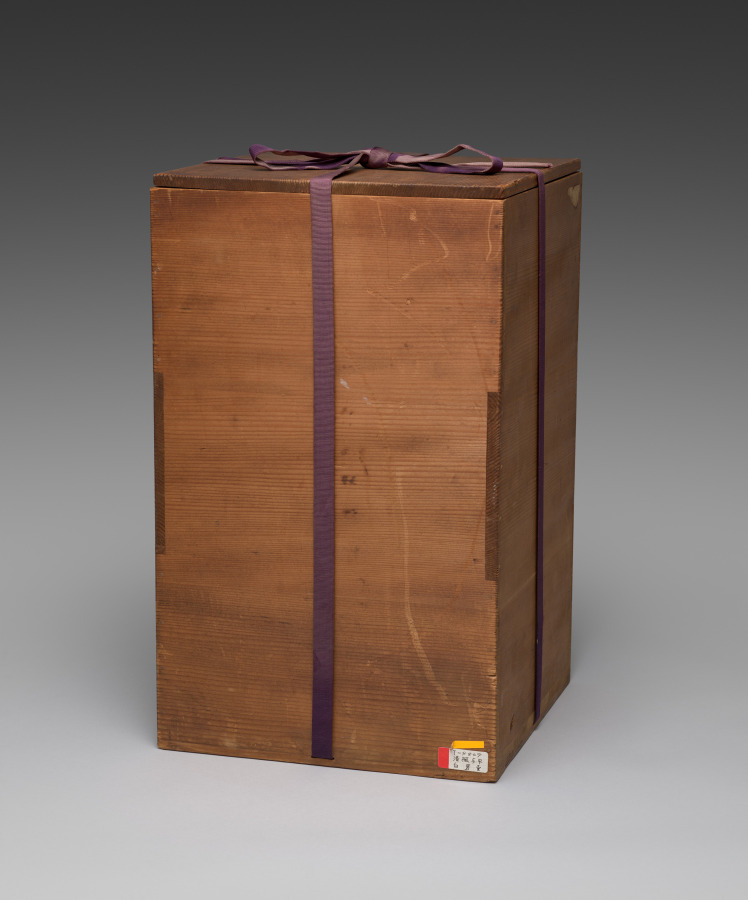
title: Pheasants in Cherry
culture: Japan, Meiji period (1868–1912)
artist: Seifū Yohei III (Japanese, 1851–1914)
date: 1900–1914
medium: Porcelain with molded and carved design, underglaze color, and cream glaze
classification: Ceramic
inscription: 大日本清風造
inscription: 清風製之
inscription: 清風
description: Like the design of Flower Vase with Phoenix in Paulownia (CMA 2022.199), the pair of pheasants in a dramatic landscape setting on this vase was created by adding clay to the surface of the clay body and then molding and carving it. Here, instead of a typical white clay, Yohei III has used an ivory clay. He then added gradated pink around the complex design, which with its multitude of cherry blossoms must have been painstaking to mask with precision. For the birds’ eyes, he added a touch of yellow. He then fired the vase with an allover translucent cream glaze. The resulting kanpakuji piece is one in which an academic subject long favored by painters of the Kano school for screen and sliding door paintings in important buildings, that of impressively sized birds within a scene of precipitous, angled rock faces and twisting trees, is made soft and ethereal while retaining a sense of gravitas.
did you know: The unusually large scale of this piece and the fact that he signed the base “Made by Seifū of Great Japan” also suggest that it was made for public display.